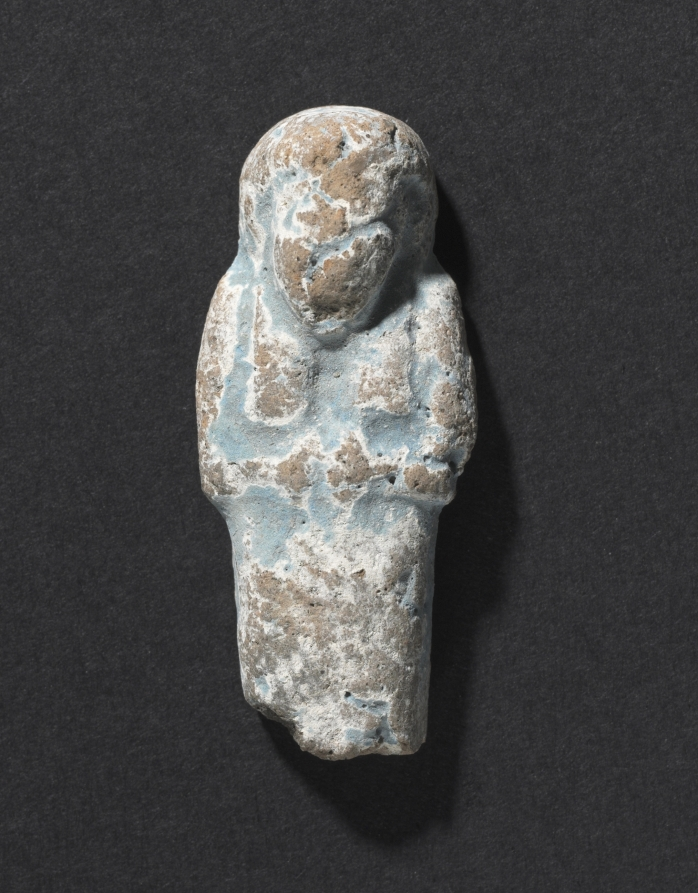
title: Shawabty of Ditamenpaankh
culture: Egypt, Late period (715–332 BCE), Dynasty 25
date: 715–656 BCE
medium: terracotta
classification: Funerary Equipment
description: High demand for shawabtys in the Late Period, a time when as many as 400 or more shawabtys were placed in the tomb with the deceased, gave rise to a specialized container for storing them: the shawabty box. This example is inscribed for the lady of the house, Ditamenpaankh, and was probably one of a pair originally made for her. The single-masted boat on the box's lid is perhaps an allusion to the pilgrimage of the deceased to the holy city of Abydos, the cult city of Osiris, king of the dead. The shawabtys inside are crude, mass-produced examples cast in an open mold. Made of terracotta, their blue paint imitates more costly shawabtys made of faience. As for the shawabty spell, it has been removed from its traditional location on the shawabty's front and relocated onto the sides of box, where it needed only to be written once, thus expediting production.